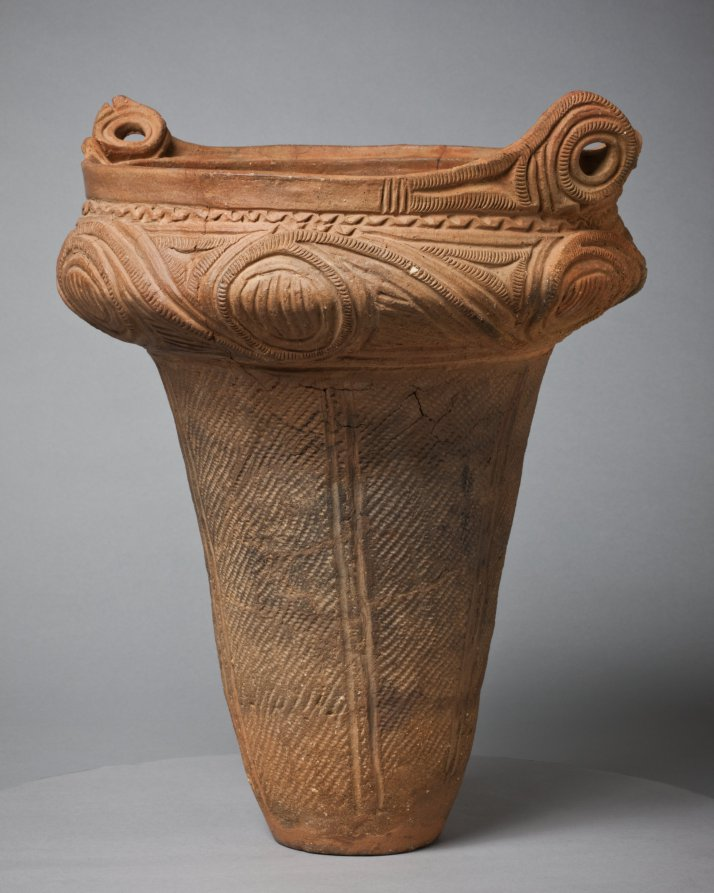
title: Urn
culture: Japan, Jōmon period (c. 10,500–300 BCE)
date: c. 2000 BCE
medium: earthenware, terracotta, impressed and incised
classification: Ceramic